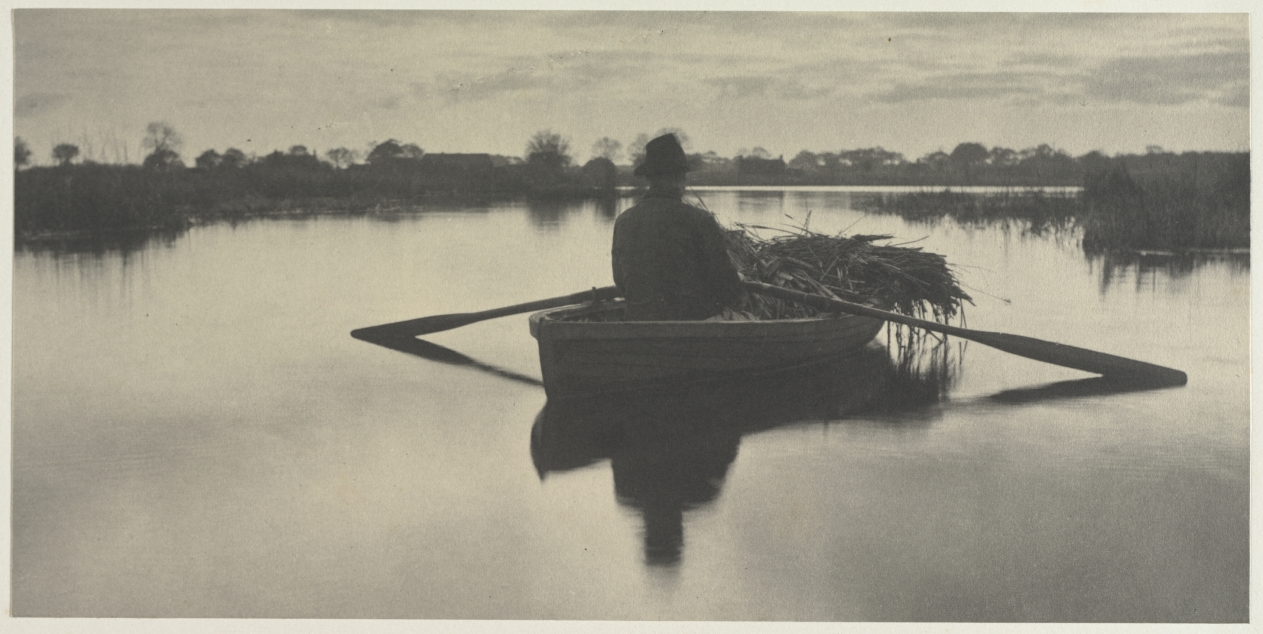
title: Rowing Home the Schoof-Stuff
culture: England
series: Life and Landscape on the Norfolk Broads, pl. XXI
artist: Peter Henry Emerson (British, 1856–1936)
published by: Sampson Low, Marston, Seale and Riverton (with T.F. Goodall)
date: 1886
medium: platinum print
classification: Photograph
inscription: Written in pencil on verso: "G 3/5"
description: Reacting against the theatrical, sentimental photogaphs made by his contemporaries, Peter Henry Emerson pursued a direct and more naturalistic form of photography. He discovered his subjects in familiar scenes from everyday life and captured them on film. This image was included among the 40 prints illustrating Life and Landscape on the Norfolk Broads, one of many books Emerson published on the marsh dwellers of East Anglia. In this photograph the word "schoof" refers to the sheaf of marsh plants that have been harvested to be dried and stored at home.